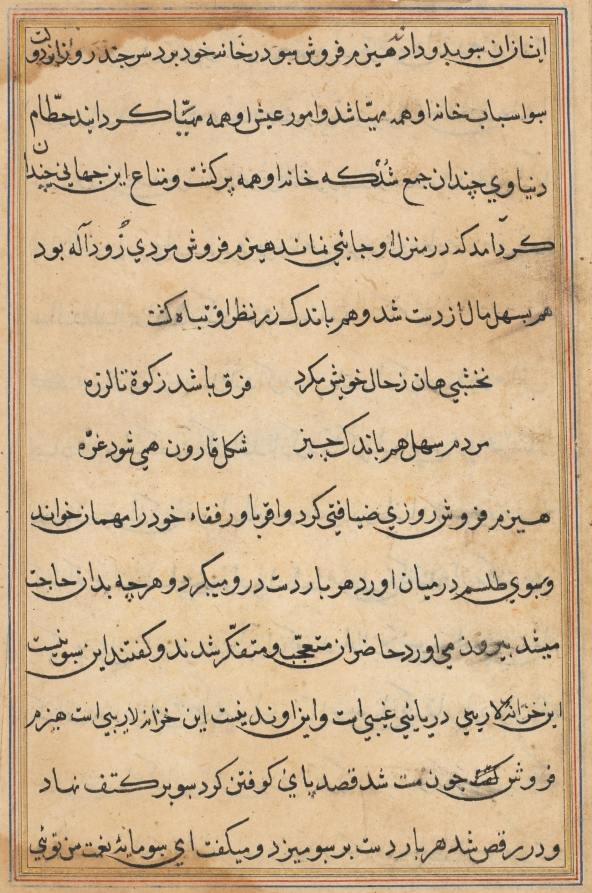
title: Page from Tales of a Parrot (Tuti-nama): text page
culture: Mughal India, court of Akbar (reigned 1556–1605)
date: c. 1560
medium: gum tempera, ink, and gold on paper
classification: Painting